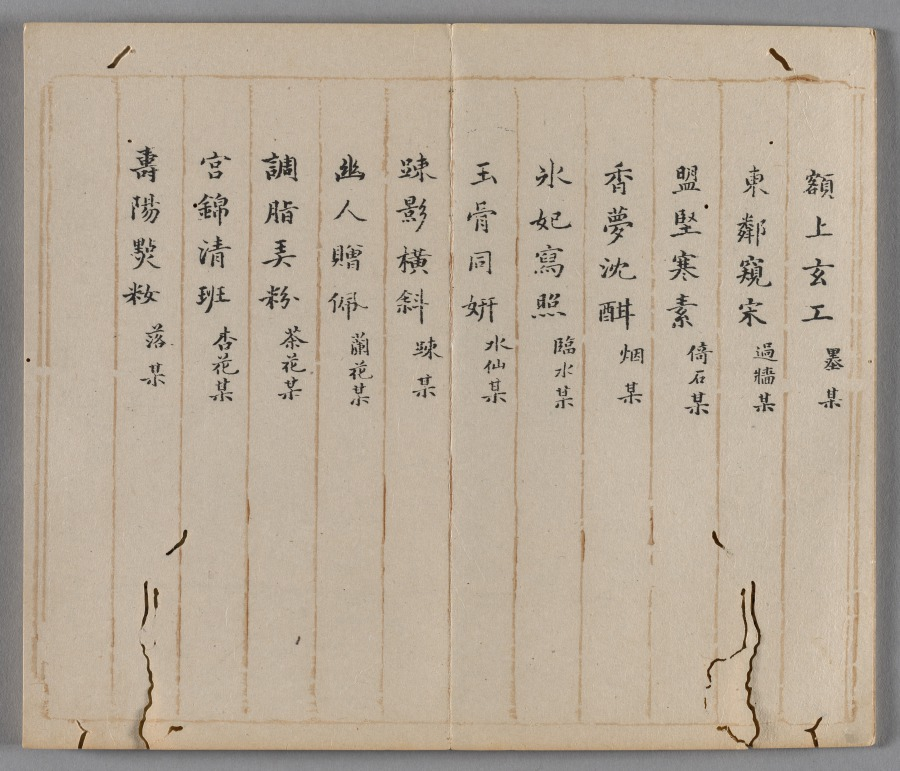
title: Ten Bamboo Studio Painting and Calligraphy Handbook (Shizhuzhai shuhua pu): Plum Blossoms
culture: China, Qing dynasty (1644-1911)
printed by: Hu Zhengyan (Chinese, c. 1584–1674)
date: 1633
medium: Woodblock-printed book; ink and colors on paper; first edition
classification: Print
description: Color printing reached a level of perfection in the early 1600s, as seen in this Ten Bamboo Studio Collection of Calligraphy and Painting and the Mustard Seed Garden Manual of Painting (printed 1679 and 1701). The painterly quality, precision in registering (aligning) the woodblocks, and harmonious colors made them the most successful color print editions in Chinese history. Both editions were printed and compiled in Nanjing, spread nationwide, and had a great impact on the arts in Japan and Korea.